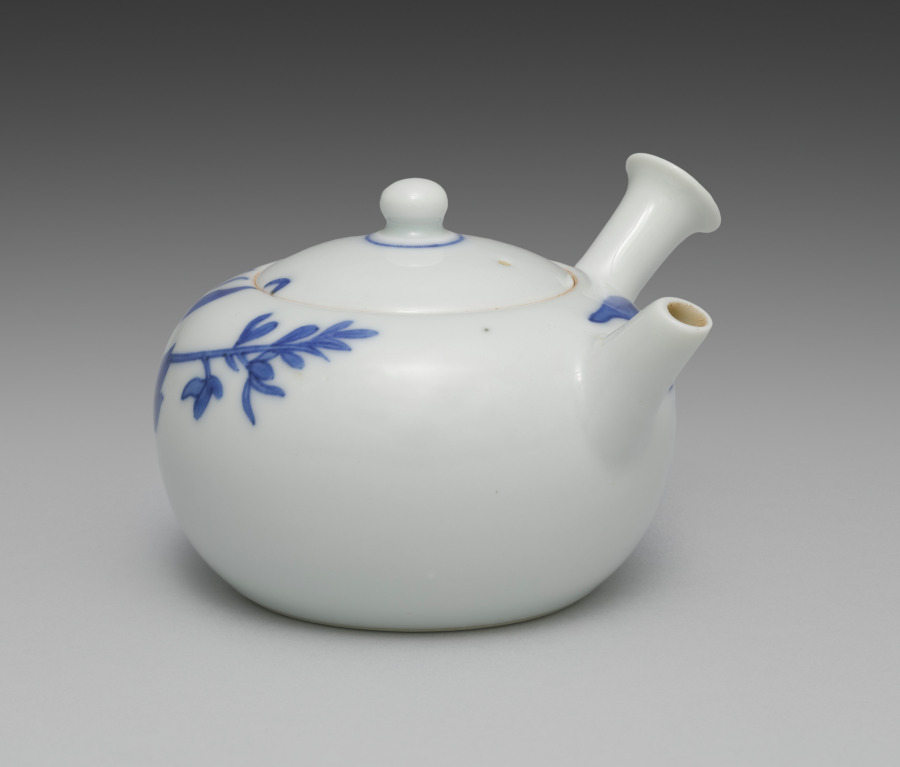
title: Teapot from Tea Set with Orchids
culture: Japan, Meiji period (1868–1912)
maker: Seifū Yohei III (Japanese, 1851–1914)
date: c. 1893–1914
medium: Porcelain with underglaze blue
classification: Ceramic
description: Although the teapot here is stored in a separate box from the five cups, these six pieces may once have been part of a tea set that included other tools such as a water cooler. The teacups have orchid flowers on both sides in underglaze blue, as well as a blue band inside the footring. The teapot has the same design and a blue band painted around the bottom of the lid’s knob. The cups’ long wood storage box is stamped on the exterior, over the lid and base, with a small red seal reading “Satō.” The same seal appears on five small squares of yellow textile, one placed in the bottom of each compartment in the teacup storage box. These are additional to the customary yellow cloths stamped with a “Seifu” seal. Interestingly, four of the Seifū cloths are stamped with an ovoid seal, while the remaining cloth, which is a slightly lighter color, has an unusual seal that is not quite gourd-shaped and with the fū of Seifū in a stylized, unrecognizable form. The teapot has its own box with a Satō seal and is wrapped with an orange textile stamped with the same unusual Seifū seal. A set with a very similar surface design is in the Brooklyn Museum. The Brooklyn set has a water cooler and a small pitcher, in addition to the teapot and cups, and all are in a single storage box. This box records the tea tools as made with kanpakuji, or “bright-jewel white porcelain,” counted among Yohei III’s most important inventions, and carved images. In fact, both sets have a white surface much closer in coloration to the cool white of porcelain clay used in Kyoto at the time, and the designs are simply painted. The Brooklyn set was thus likely mismatched at some point with a box intended for another tea set. Nonetheless, the box may have helped prevent the set’s original components from being dispersed, and the set itself provides insight into how the other tools from the present set may have looked.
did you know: This tea set with orchids has a side-handled pot called a kyūsu, used for steeping, straining, and serving tea.